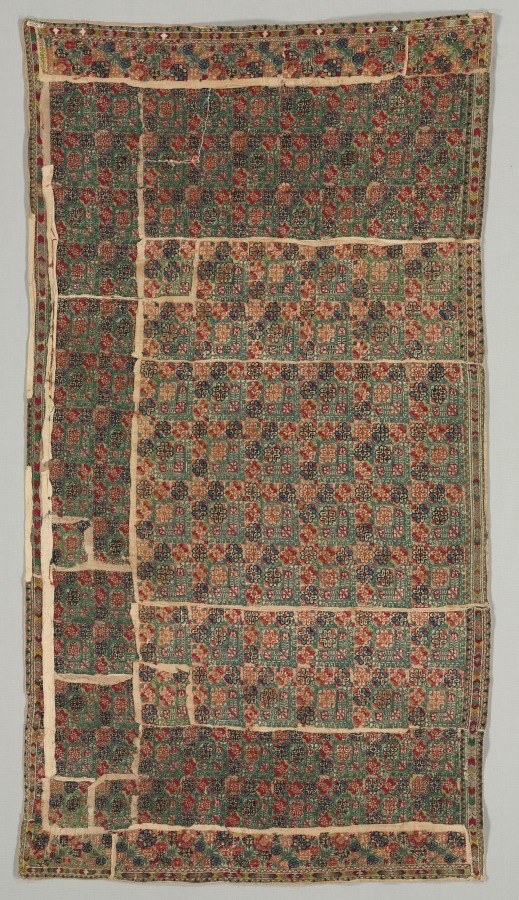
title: Embroidery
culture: Turkey ?, 19th century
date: 19th century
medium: embroidery: silk and metal strips on linen tabby ground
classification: Embroidery